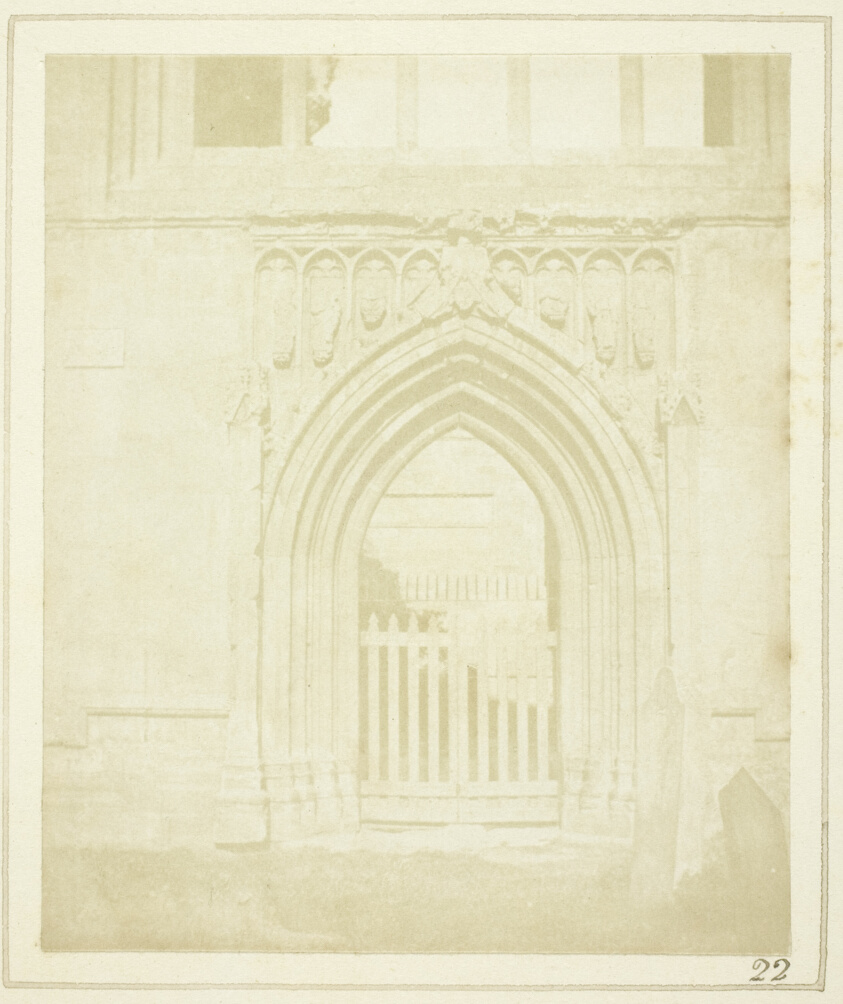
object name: Photograph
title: Melrose Abbey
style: 19th century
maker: William Henry Fox Talbot (English, 1800–1877)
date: 1844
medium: Salted paper print, plate XXII from the album "Sun Pictures in Scotland" (1845)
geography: England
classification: salted paper print; photographic process; photography; photograph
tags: Collected by Hugh Edwards